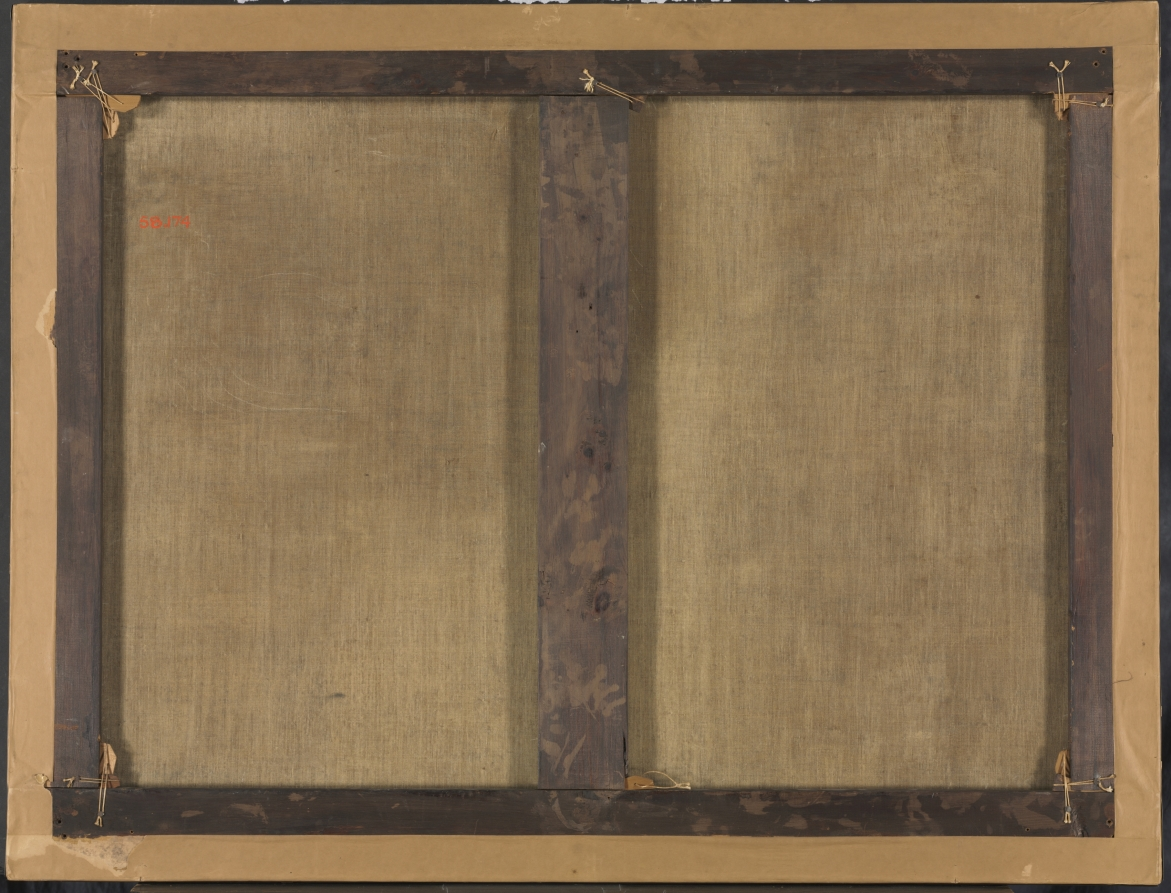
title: A Family Meal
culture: France, 17th century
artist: Le Nain family (French)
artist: after Le Maître des Jeux (French)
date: c. 1645–55 or later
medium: oil on canvas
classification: Painting